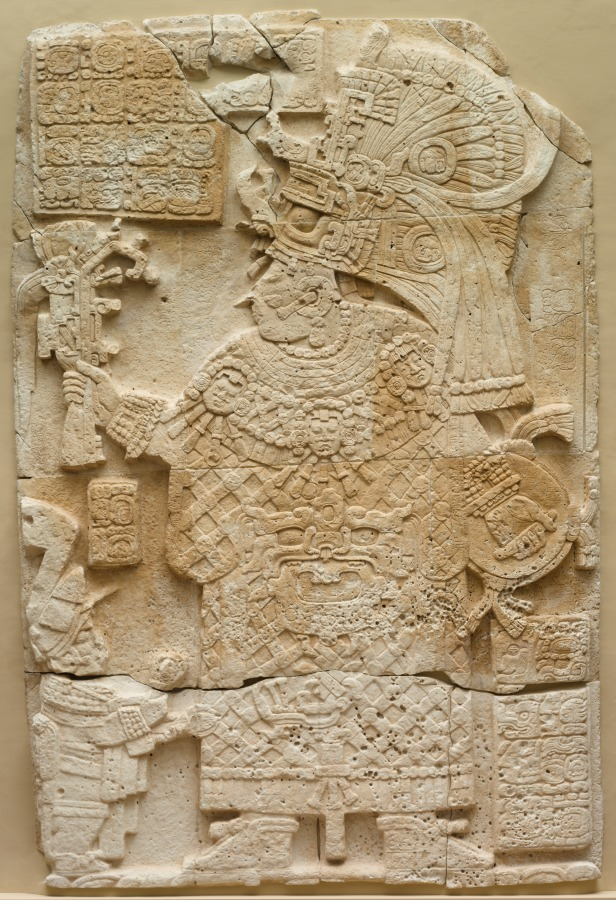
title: Front Face of a Stela (Free-standing Stone with Relief)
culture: Mesoamerica, Guatemala, Department of the Petén, El Perú (also known as Waka'), Maya (250-900), Classic period (200-1000)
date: 692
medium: limestone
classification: Sculpture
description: In stone sculpture, Maya rulers celebrated the milestones of their reigns with flamboyant portraits like this image of a royal woman, created to mark the passage of a twenty-year period known as the k’atun. She originally stood in a plaza next to a portrait of her spouse (see photo), with whom she ruled El Perú-Waka’, a provincial Maya town. A member of the powerful dynasty of a nearby Maya center, she seems to have held higher authority than her husband, serving as a military governor. Her costume reflects her status: the headdress has a fan of green quetzal feathers and her jewelry probably refers to jade-both among the most prized of ancient materials. Jade beads also may form the net over her garment, belted with the head of a fish-like creature. Completing the costume are the scepter and shield she grasps in her hands. The dwarf at her side may be a court attendant. The hieroglyphic text refers to important dynastic dates.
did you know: The powerful Maya queen shown on this stela is known as Lady K’abel.